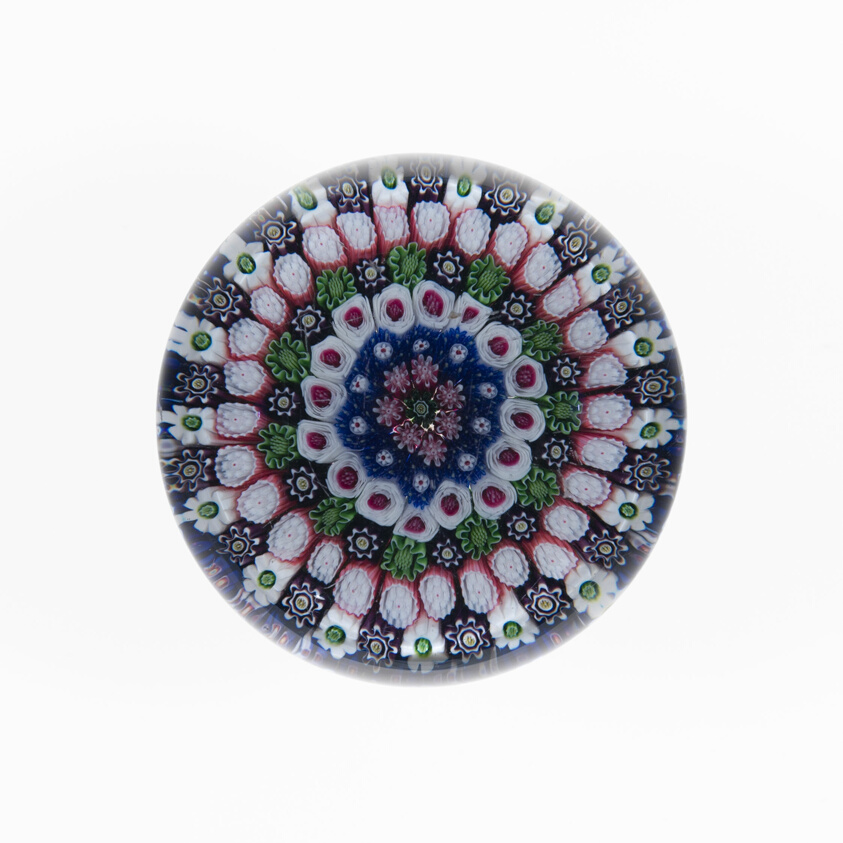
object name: Glass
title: Paperweight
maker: Clichy Glassworks (Cristalleries de Clichy); Clichy, France, 1837-1885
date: c. 1845–55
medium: Glass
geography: Clichy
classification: paperweight; millefiori; european decorative arts; glass